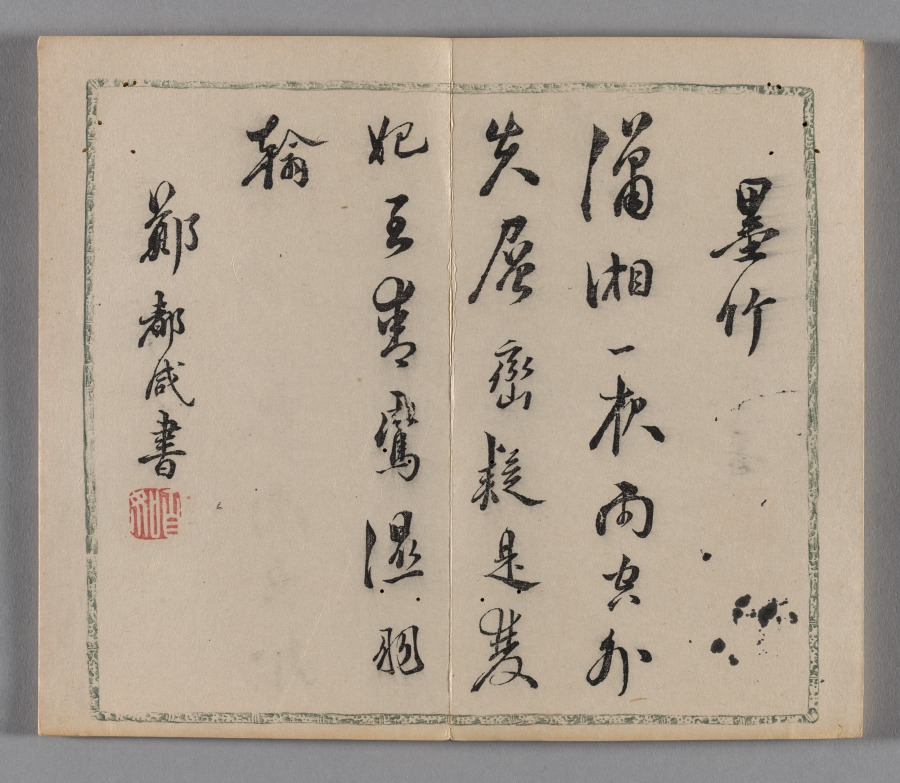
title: Ten Bamboo Studio Painting and Calligraphy Handbook (Shizhuzhai shuhua pu): Round Fans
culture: China, Qing dynasty (1644-1911)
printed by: Hu Zhengyan (Chinese, c. 1584–1674)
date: 1633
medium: Woodblock-printed book; ink and colors on paper; first edition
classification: Print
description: Color printing reached a level of perfection in the early 1600s, as seen in this Ten Bamboo Studio Collection of Calligraphy and Painting and the Mustard Seed Garden Manual of Painting (printed 1679 and 1701). The painterly quality, precision in registering (aligning) the woodblocks, and harmonious colors made them the most successful color print editions in Chinese history. Both editions were printed and compiled in Nanjing, spread nationwide, and had a great impact on the arts in Japan and Korea.